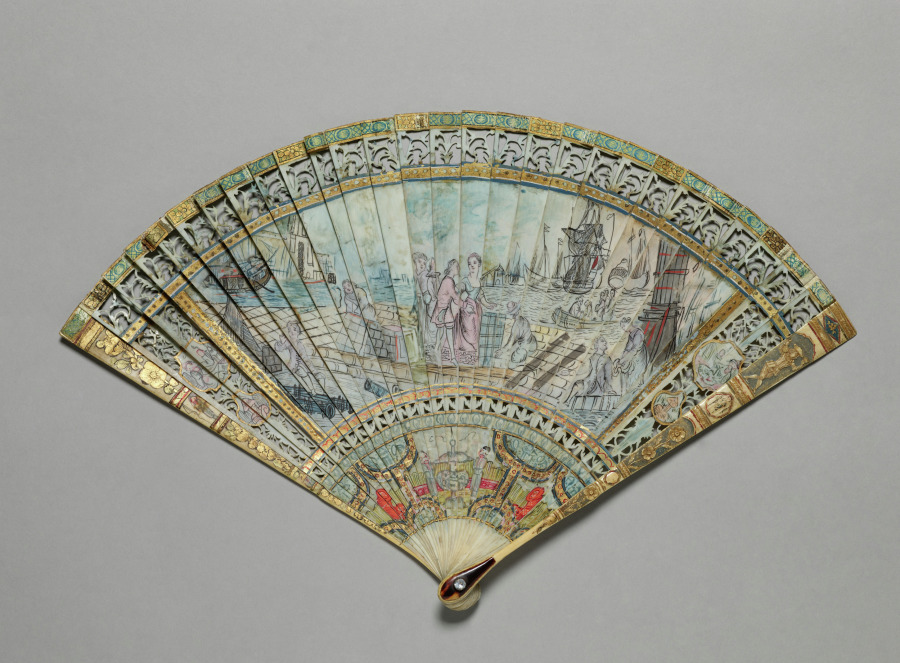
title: Brise Fan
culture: Italy ?, 18th century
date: c. 1725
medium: ivory, metal pin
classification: Miscellaneous